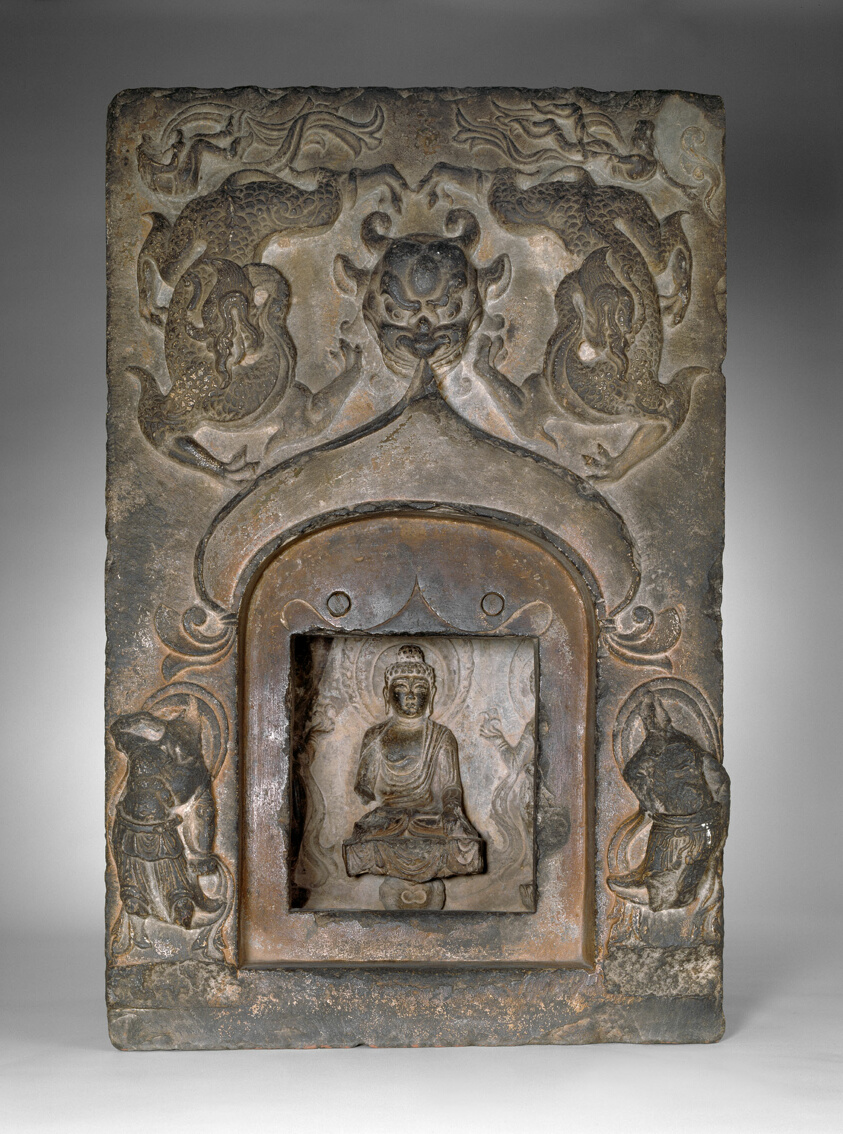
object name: Sculpture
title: Section of a Buddhist Pagoda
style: Chinese (culture or style)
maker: China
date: Tang dynasty (A.D. 618–907), dated 724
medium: Limestone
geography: China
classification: stone; shrine; asian art; sculpture